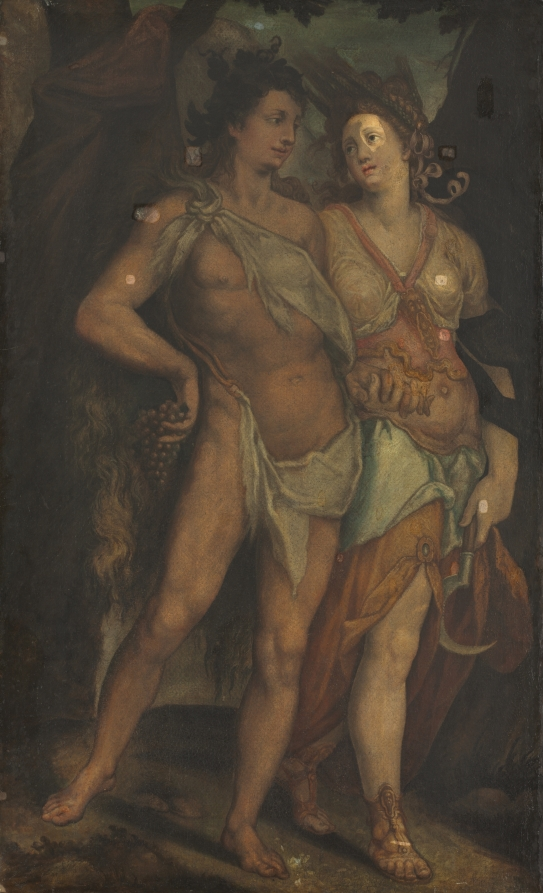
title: Ceres and Bacchus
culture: Flanders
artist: copy after Bartholomaeus Spranger (Flemish, 1546–1611)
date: 1600s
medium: oil on canvas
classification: Painting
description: This painting is a copy of a print by Jan Harmensz Muller (Dutch, 1571–1628), originally based on a painting by Spranger. Spranger often used the iconography of Ceres and Bacchus, two important agricultural deities. Muller's print has the Latin inscription Sine Cerere et Bacchio friget Venus, which translates to "without Ceres and Bacchus, Venus grows cold." The motto indicates that Love, represented by Venus, is impossible without the nourishment of food and drink, as the deities of grain and wine walk hand in hand.